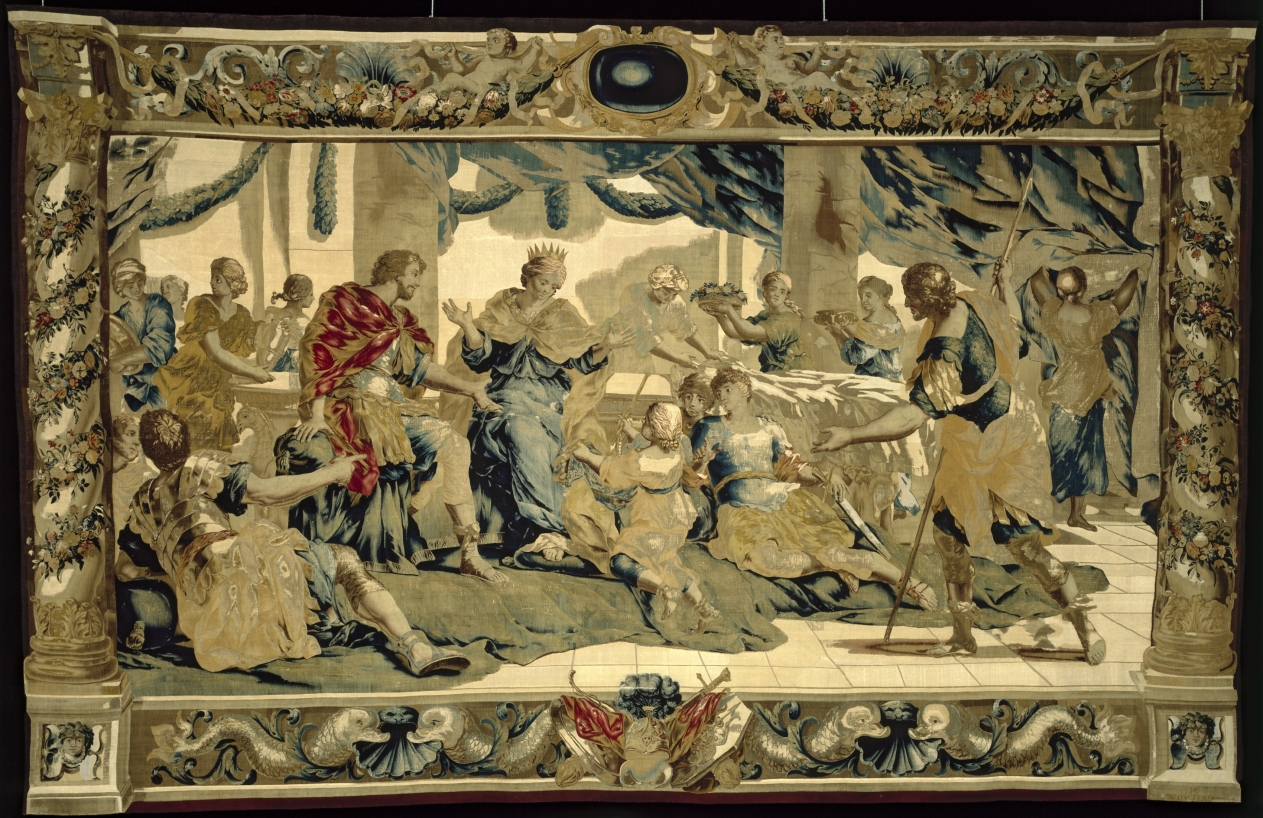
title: Cupid disguised as Aeneas's son, presents gifts to Dido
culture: Belgium, 17th century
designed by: Giovanni Francesco Romanelli (Italian, 1610–1662)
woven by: Michael Wauters (Flemish, 1679)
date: 1679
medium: tapestry weave: silk and wool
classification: Tapestry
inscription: signed lower left: M. Wovters.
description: Achates, with spear in hand, presents Cupid, who is disguised as Aeneas's son, to Queen Dido. He offers her gifts to encourage her to love Aeneas who is seated at her side. Attendants are preparing a banquet that Dido is giving in honor of Aeneas and his companions.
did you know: This tapestry is one from a series of eight that depicts the tragic love story of Dido and Aeneas. They were gifted to the museum for display in the armor court.